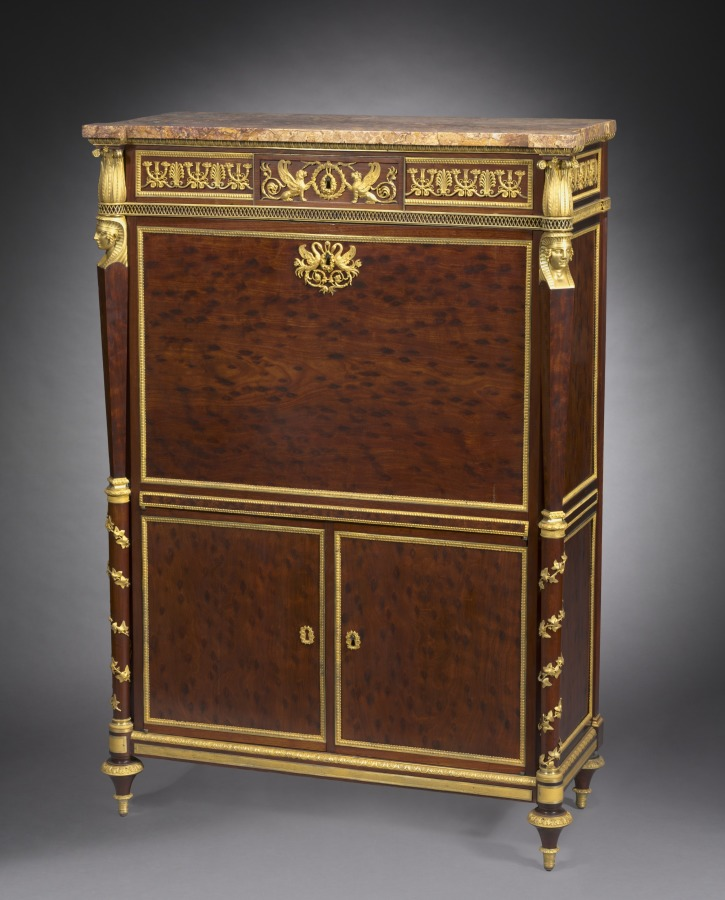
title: Secretary (Secrétaire)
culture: France, 18th century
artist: attributed to Bernard Molitor (French, 1755–1833)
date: c. 1800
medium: mahogany on oak carcass, ormolu mounts, marble top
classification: Furniture and woodwork